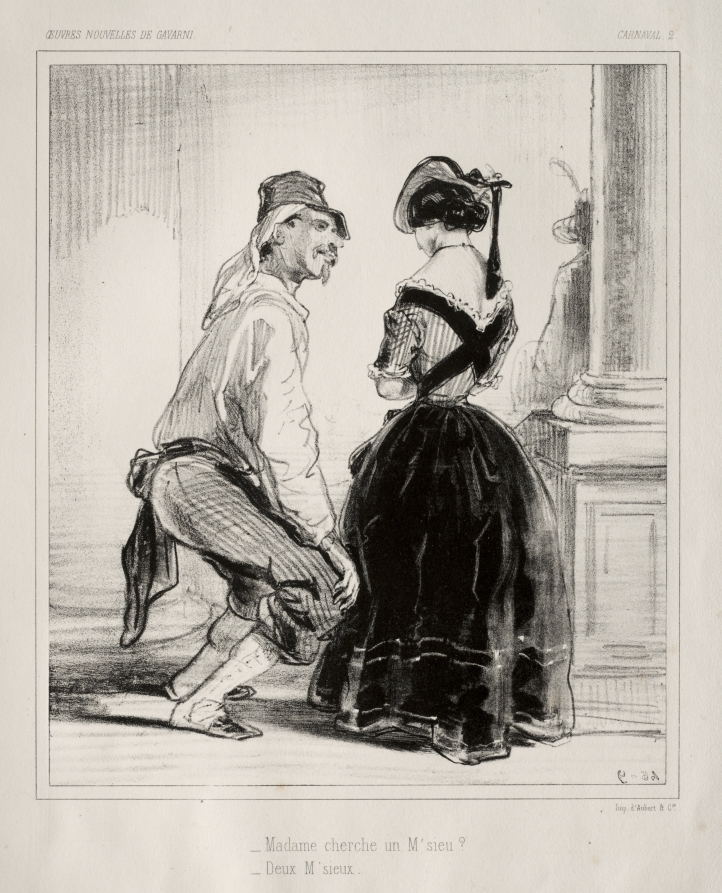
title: Carnaval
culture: France, 19th century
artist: Paul Gavarni (French, 1804–1866)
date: c. 1841–47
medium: lithograph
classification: Print